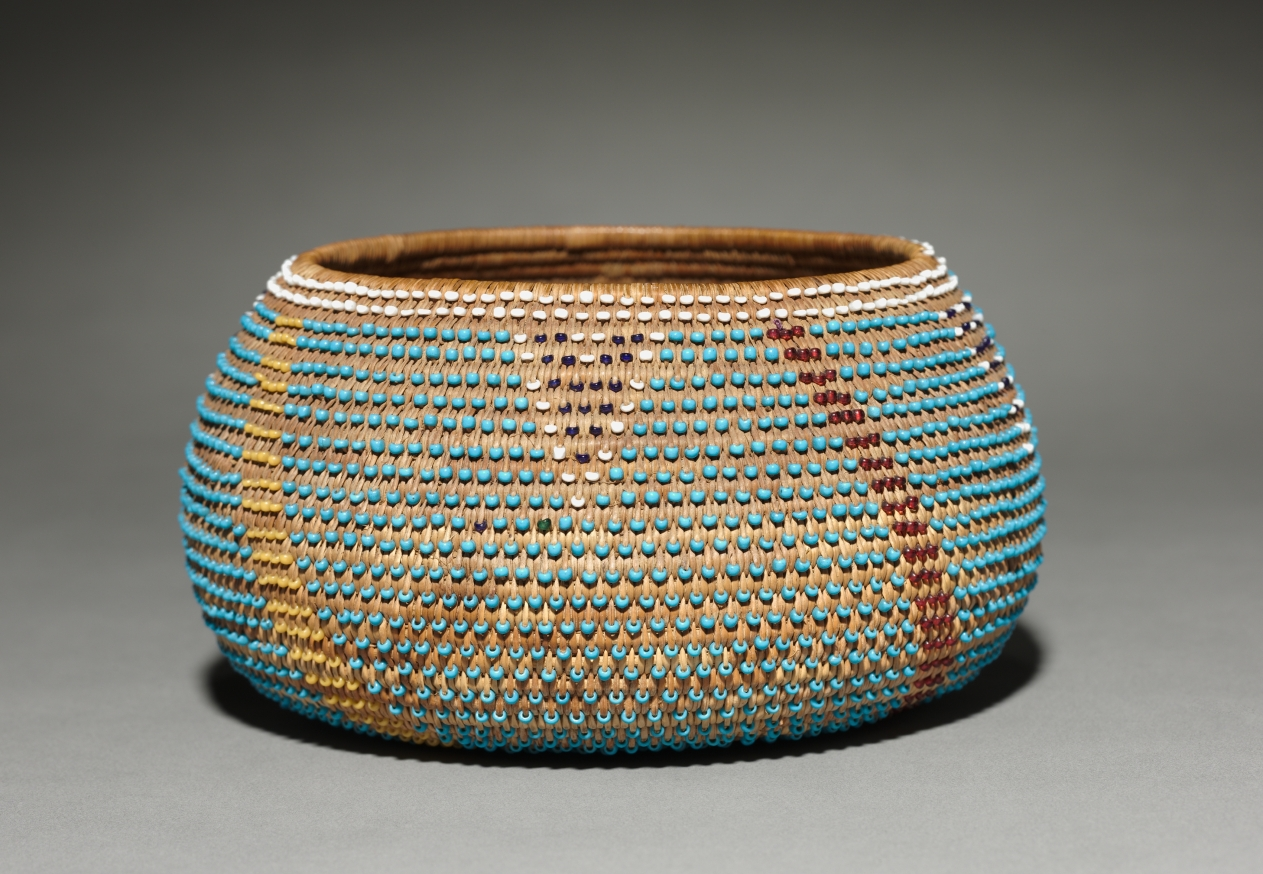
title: Gift Bowl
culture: California, Wappo, late 19th- early 20th century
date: c. 1890– 1905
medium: Sedge with beads; coiled ( 3 rods)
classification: Basketry